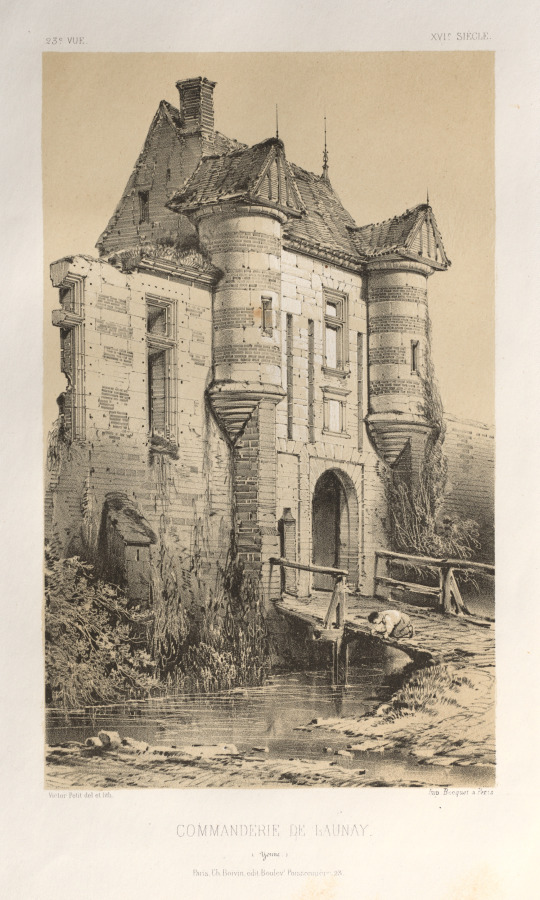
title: Architecture Pittoresque ou Monuments des xveme. Et xvieme. Siecles: Chateaux De France des XV et XVI Siecles:Pl. 23, Commanderie De Launay (Yonne)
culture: France, 19th century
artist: Victor Petit (French, 1817–1874)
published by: Charles Boivin (publisher and editor); Lith de Godard a Paris (printer)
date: published 1860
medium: lithograph with tint stone, from portfolio of 100 lithographs with tint stone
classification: Print